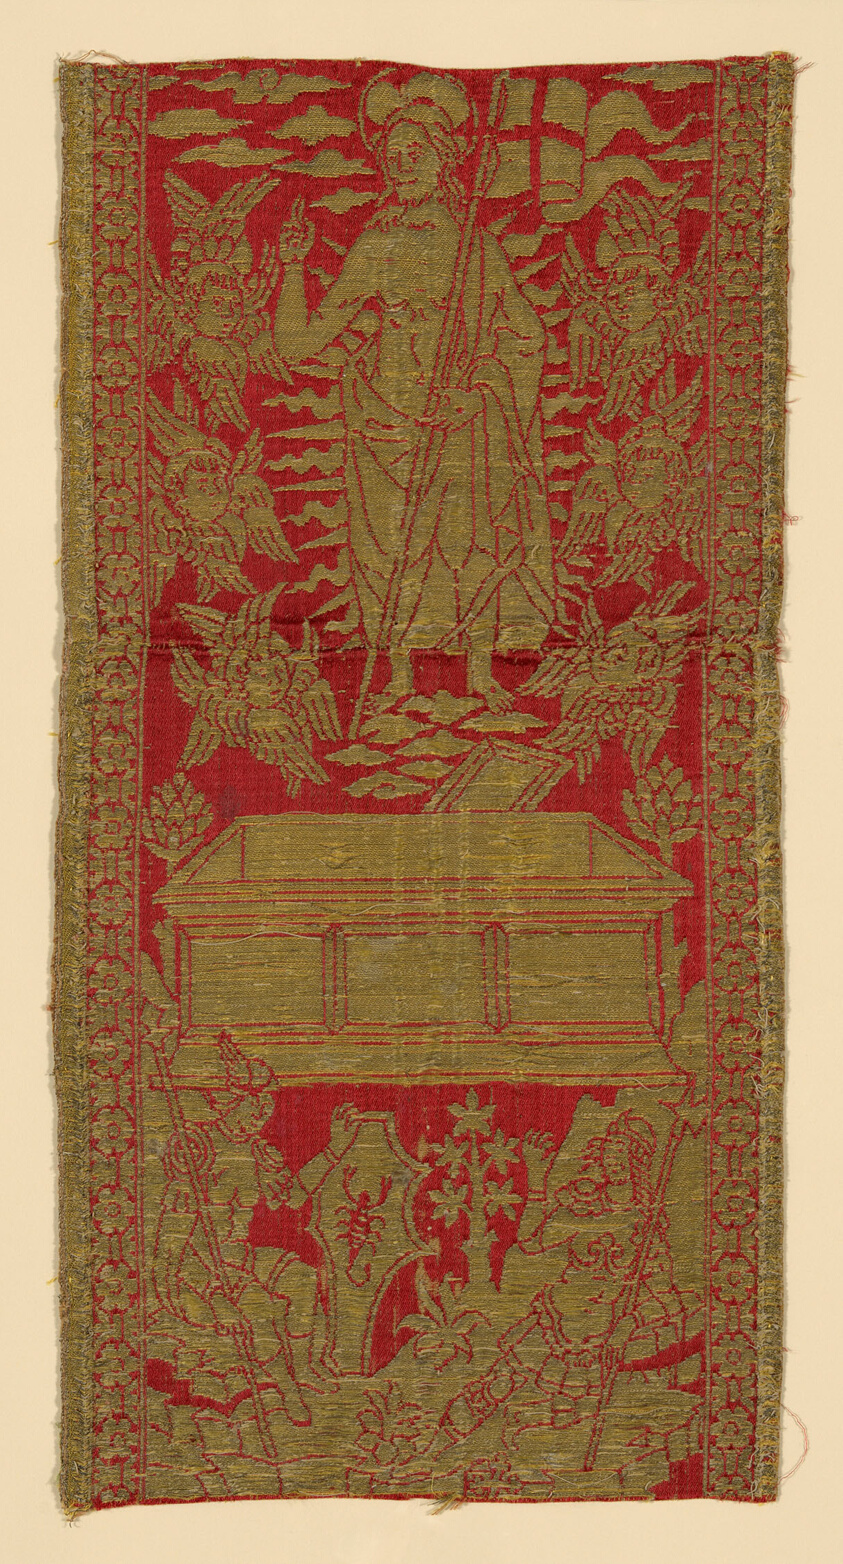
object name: Religious/Ritual Object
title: Fragment (From an Orphrey Band)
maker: Italy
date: 15th century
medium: Silk and gilt-animal-substrate-wrapped linen, warp-float faced 4:1 satin weave with twill interlacings of secondary binding warps and supplementary patterning wefts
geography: Italy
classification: textile; weaving; liturgical; ritual objects